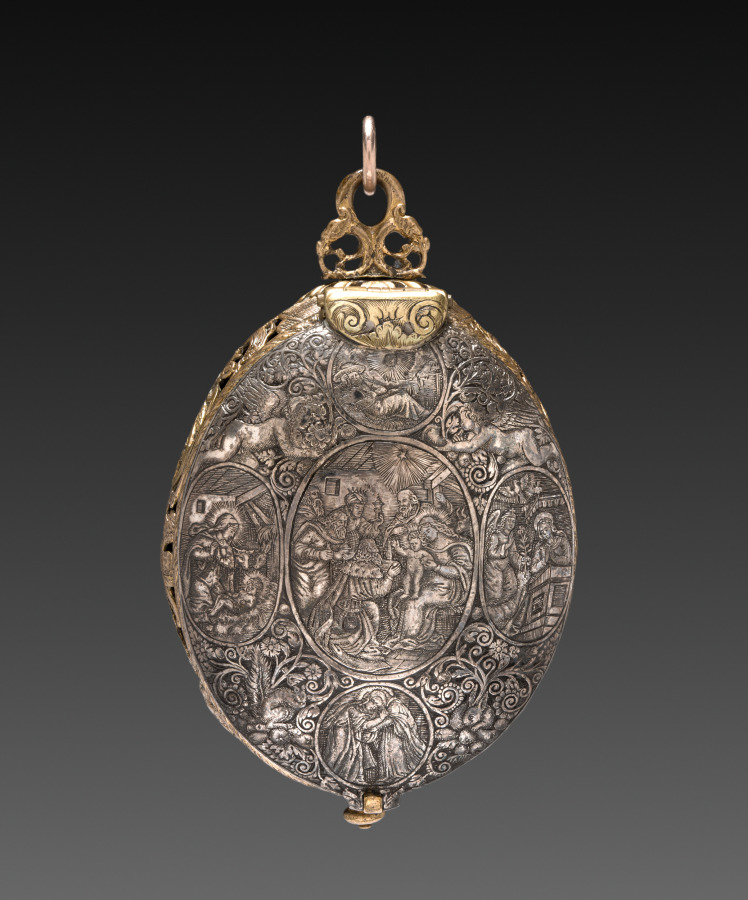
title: Engraved Egg Watch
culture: France, 16th century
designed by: Denis Martinot (French)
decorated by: attributed to Theodor de Bry (Flemish, 1528–1598)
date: 1590–1600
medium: silver, steel, and rock crystal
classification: Jewelry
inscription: inscribed: D. Martinot, Paris.